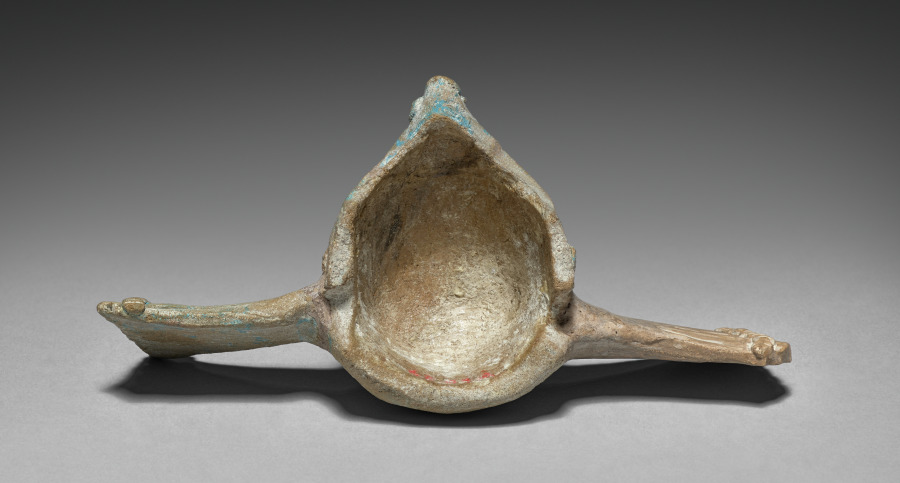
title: Warrior Figurine with Removable Headdress (headdress)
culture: Mexico, Yucatán, Jaina Island region, Campeche, Maya style (250-900)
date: 600–900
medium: earthenware with pigment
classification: Sculpture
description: The major offerings placed in the Maya graves of Jaina Island were ceramic figurines, some of Mesoamerica's finest, that depict deities and humans in a variety of roles. This removable headdress belongs to a warrior figure who once probably held weapons and wears either quilted cotton armor or the feathered uniform of a military order. We don't know why such figures are often pot-bellied.